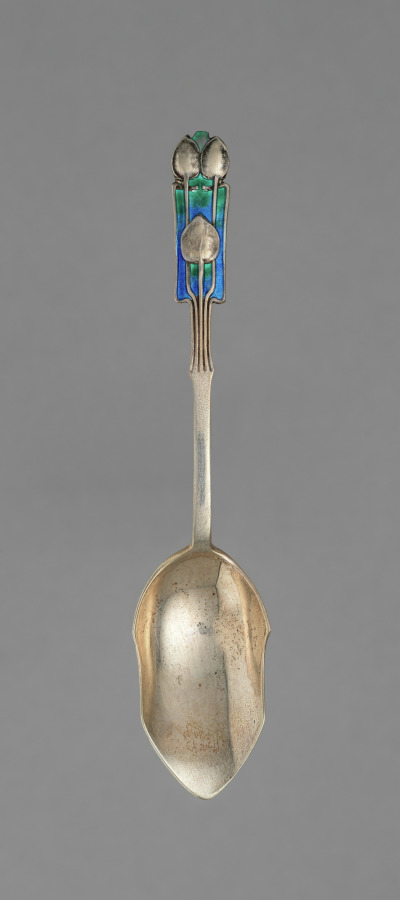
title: Set of six Spoons in Original Box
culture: England, London, 19th century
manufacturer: Liberty and Company (British)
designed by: attributed to Archibald Knox (British, 1864–1933)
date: c. 1895–1910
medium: Silver, enamel decoration and leather box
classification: Silver